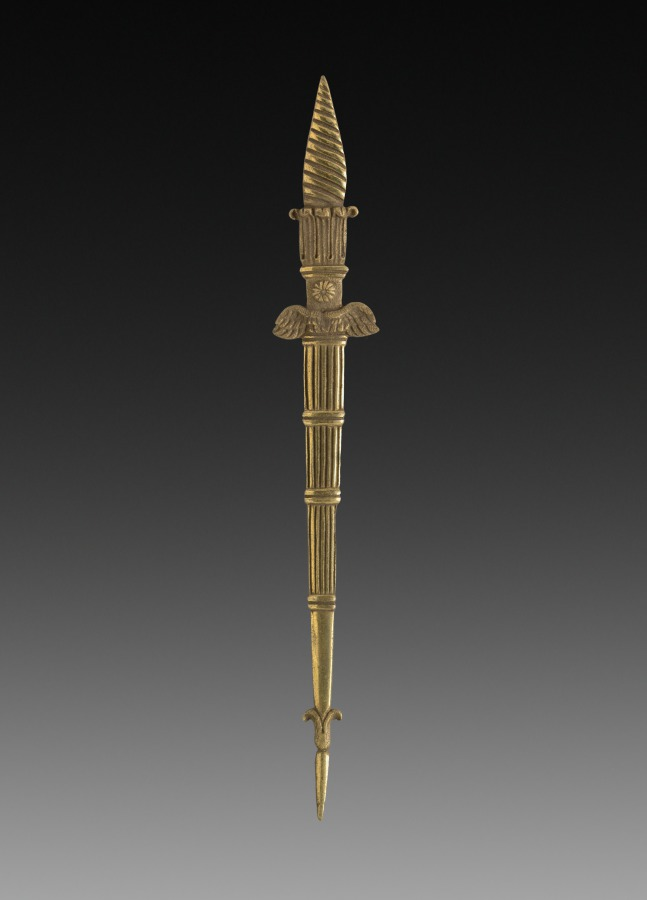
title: Ornamental Detail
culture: France, 18th century, Period of Louis XVI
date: 1775–1799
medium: gilt bronze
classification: Metalwork